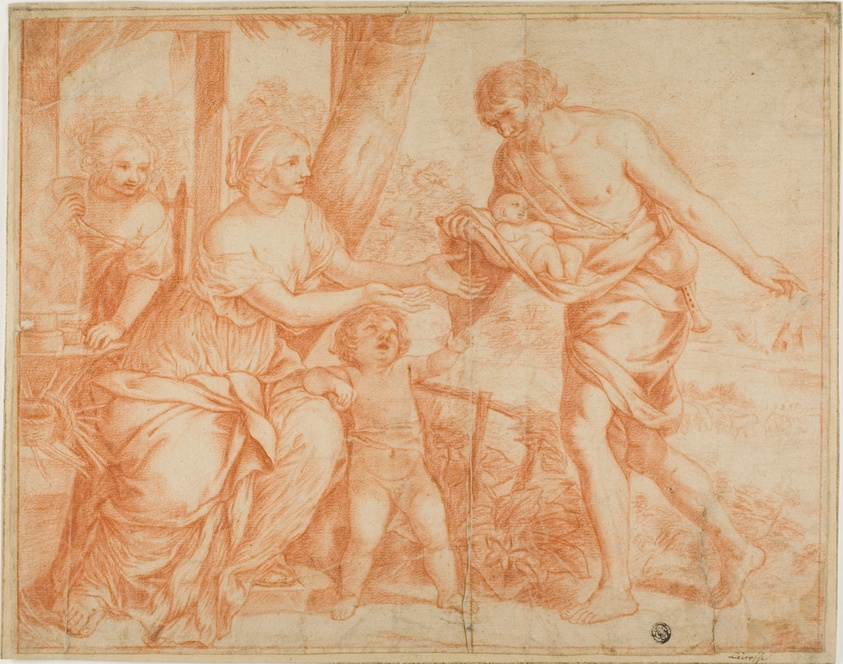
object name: Drawing and Watercolor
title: Infant Oedipus Brought Home by Shepherd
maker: Possibly Gerard de Lairesse (Flemish, 1640-1711); or after Pietro da Cortona (Italian, 1596-1669)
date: 1675/99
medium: Red chalk with stumping, on ivory laid paper, tipped onto cream laid paper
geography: Flanders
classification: chalk; drawings (visual works); prints and drawing